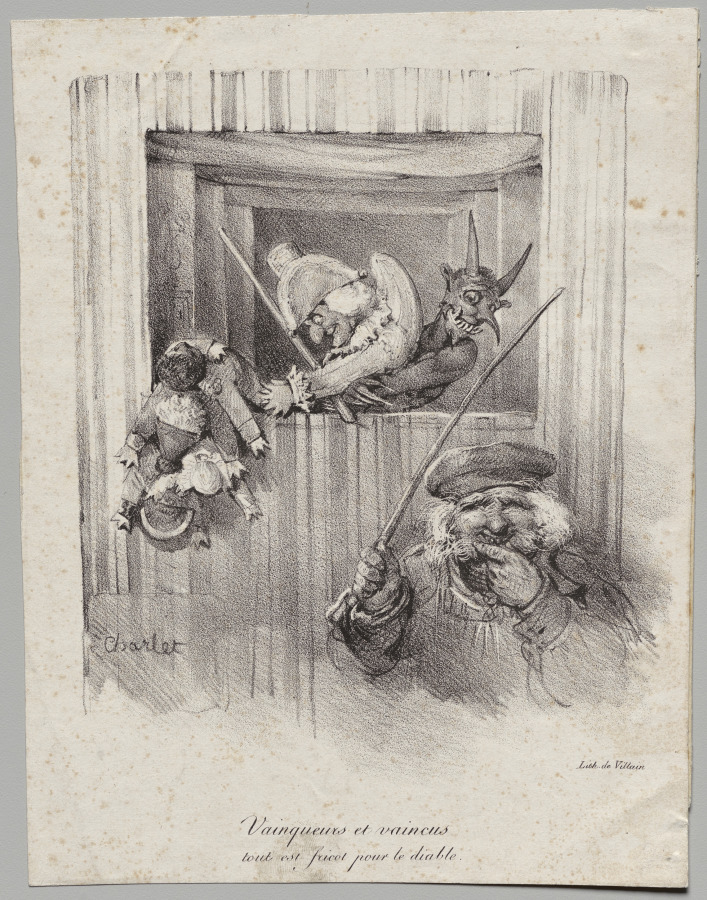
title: Winners and Losers, All Are Food for the Devil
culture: France, 19th century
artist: Nicolas Toussaint Charlet (French, 1792–1845)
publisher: Gihaut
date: 1822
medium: lithograph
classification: Print